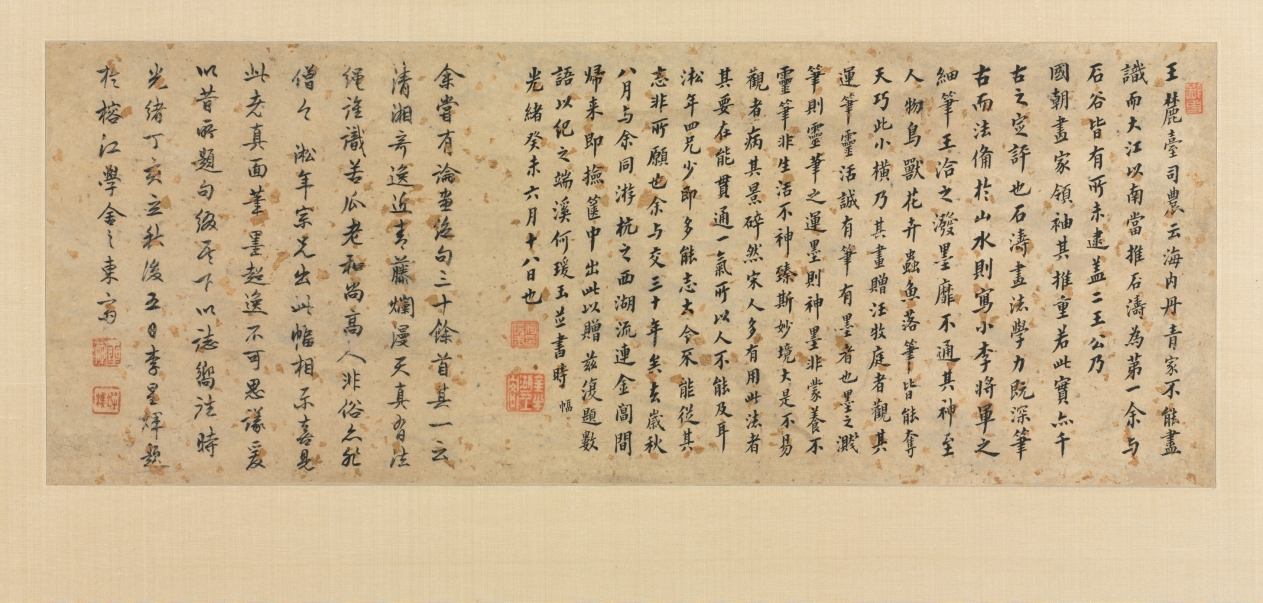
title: Spring Mist over Jiangnan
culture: China, Qing dynasty (1644-1911)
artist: Shitao (Chinese, 1642–1707)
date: 1697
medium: Hanging scroll; ink and light color on paper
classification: Painting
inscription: 揚子橋邊江水泛，柳絲弄色不管人白頭。/ 一春雨雪阻遊屐，梅花尚可清明留。/ 老去無聊藉朋輩，年來星散隨波鷗。/ 汪子無端向我發長嘯，吾將縱覧閩澥之奧妙。/ 請君置我先向畫圖看，眼前丘壑都一掃。/ 千里萬里毫端見，非墨非煙聊寄傲。/ 君家嚴親百代才，一言奏對驚風雷。/ 天子非常賜顏色，灜台稱旨今南來。/ 多少寒灰待君活，看君作意為龍媒。 丁丑春題畫，贈汪子牧庭之閩海。兼呈思白學使。清湘老人濟大滌堂下。[印]原濟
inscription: 2 colophons and 7 additional seals: 1 colophon and 4 seals of He Yuanyu 何瑗玉 (1840-?); 1 colophon and 2 seals of Li Xinhui (19th-20th c.); 1 seal unidentified.